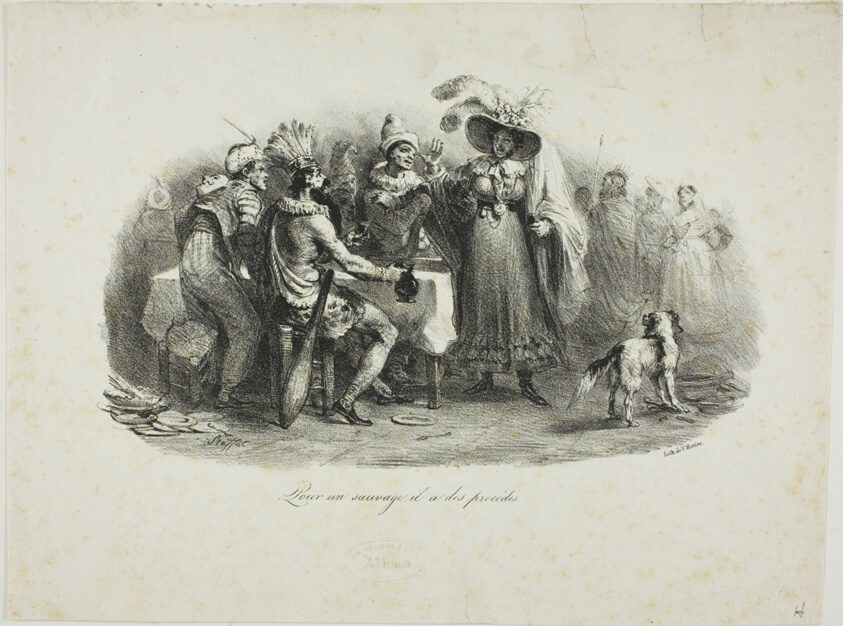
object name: Print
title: He Behaves for a Savage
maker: Denis Auguste Marie Raffet (French, 1804-1860); printed by V. Ratier (French, 19th century)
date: 1830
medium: Lithograph in black on ivory wove paper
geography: France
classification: lithograph; print; prints and drawing